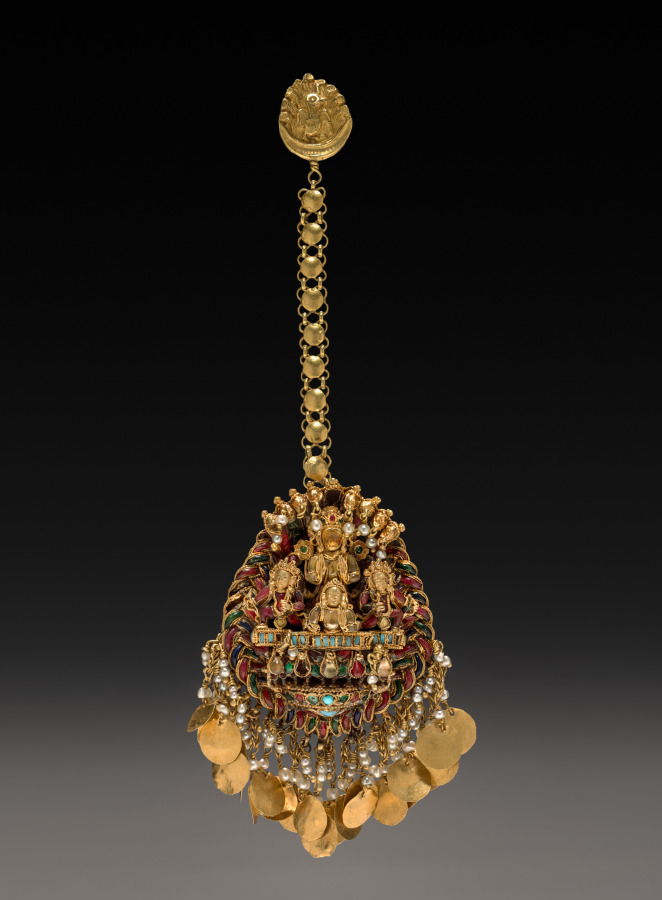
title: Forehead Pendant with Sun God Surya in a Chariot with Attendants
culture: Nepal, Kathmandu Valley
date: 1600s or 1700s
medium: gold set with jewels and semi-precious stones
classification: Jewelry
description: This pendant was made to hang on a sculpture of a deity under worship in a Nepalese temple. The image of the Sun God, venerated by both Buddhists and Hindus, is carved in translucent golden stones set into a framework of gold wire.He holds two lotuses with emeralds in the center.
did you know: The golden figure below the Sun God is the Dawn, driving the five-horse chariot across the sky.